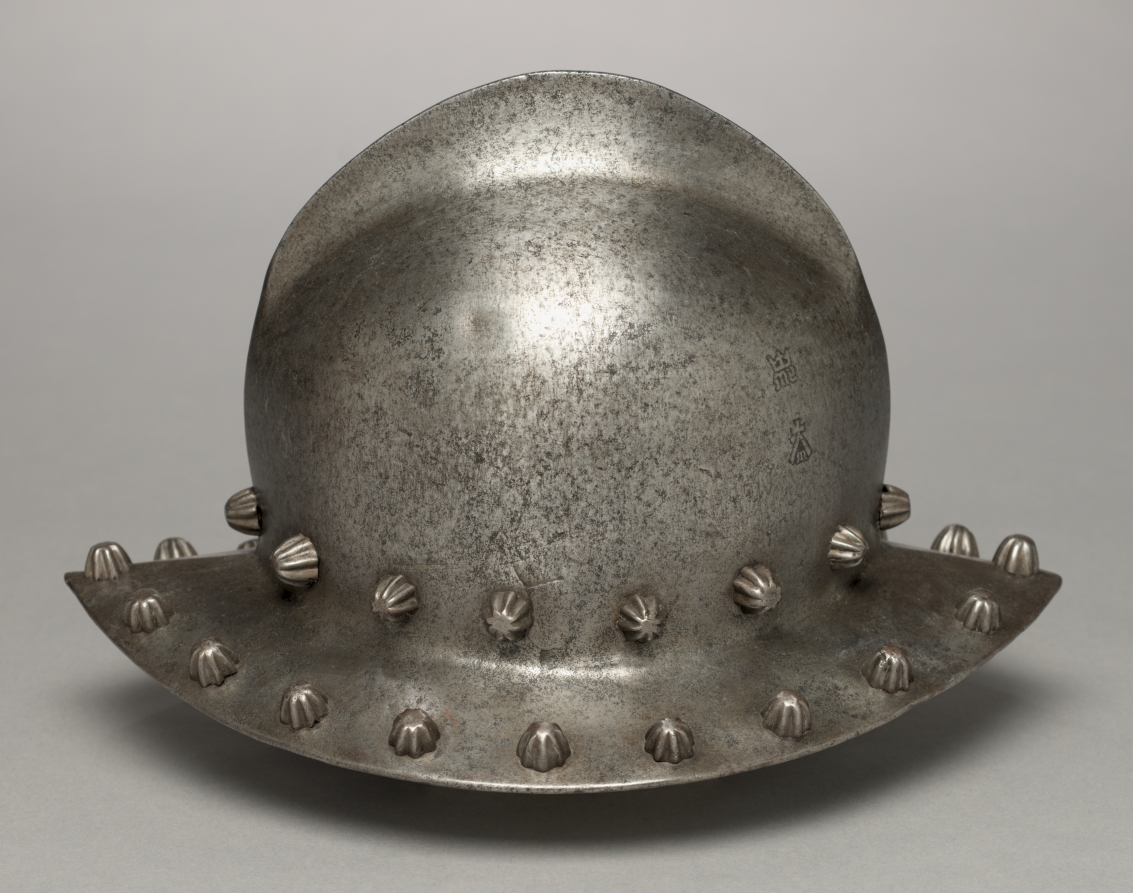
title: War Hat (or Kettle Hat)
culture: Italy, Milan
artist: workshop of Antonio Missaglia (Italian, 1416/17–1495/96)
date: c. 1475–1500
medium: steel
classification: Arms and Armor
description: Open helmets like this one were in use from the 1200s to the 1400s and are the ancestor of today's common military helmet. Such helmets were worn by foot soldiers as they attempted to scale the walls of an armed town. The slight ridge, or comb, down the center served to improve deflection and increase strength. Antonio Missaglia's workshop created helmets like this for royalty and knights in the region of Milan. Missaglia inherited the workshop from his father, who was also an armorer, and employed craftsmen who specialized in particular types of armor, such as jointed arm defenses or helmets.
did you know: The rivets along the rim were not only decorative, but a means of attachment for a liner.